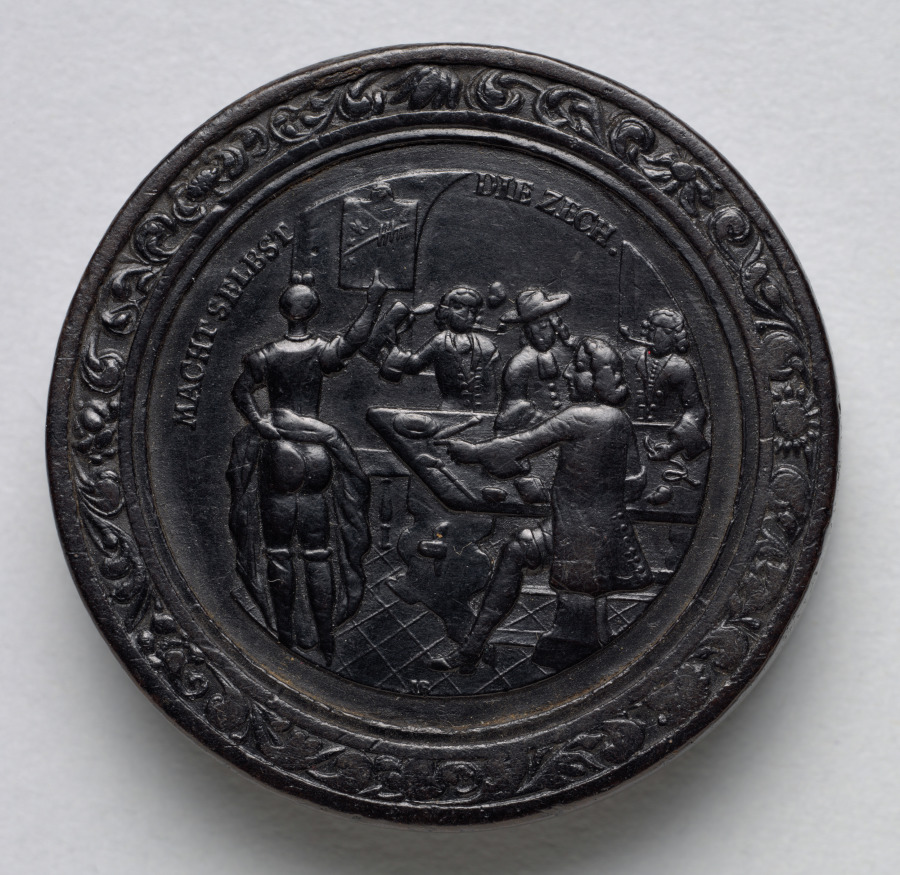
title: Gaming Piece (obverse)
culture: Germany, late 17th-early 18th Century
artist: Martin Brunner (German, 1659–1725)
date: c.1700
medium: wood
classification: Furniture and woodwork